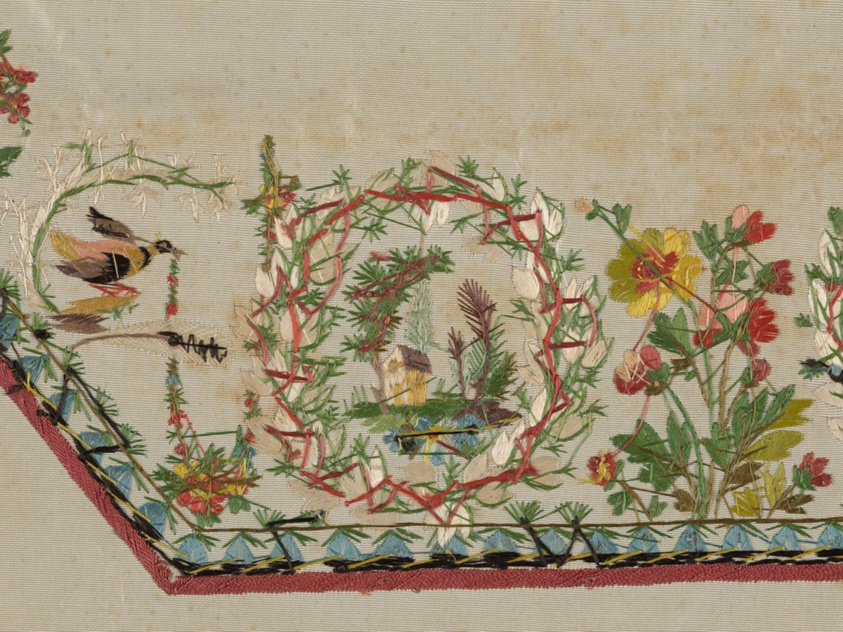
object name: Costume and Accessories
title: Embroidered Fabric for a Man's Waistcoat Front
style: 18th Century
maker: France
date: 1780s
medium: Silk, plain weave; embroidered with silk thread in individual back, outline, running, satin, split and stem stitches; couching; laid work and French knots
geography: France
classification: costume; needlework (visual works); waistcoat (garment); textile; costume - embroidery; needlework - costume; garment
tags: floral motifs, flowers, foliage, white (color), green (color), pink (color), building, floral, bird, wreaths, feathers, fashion, houses